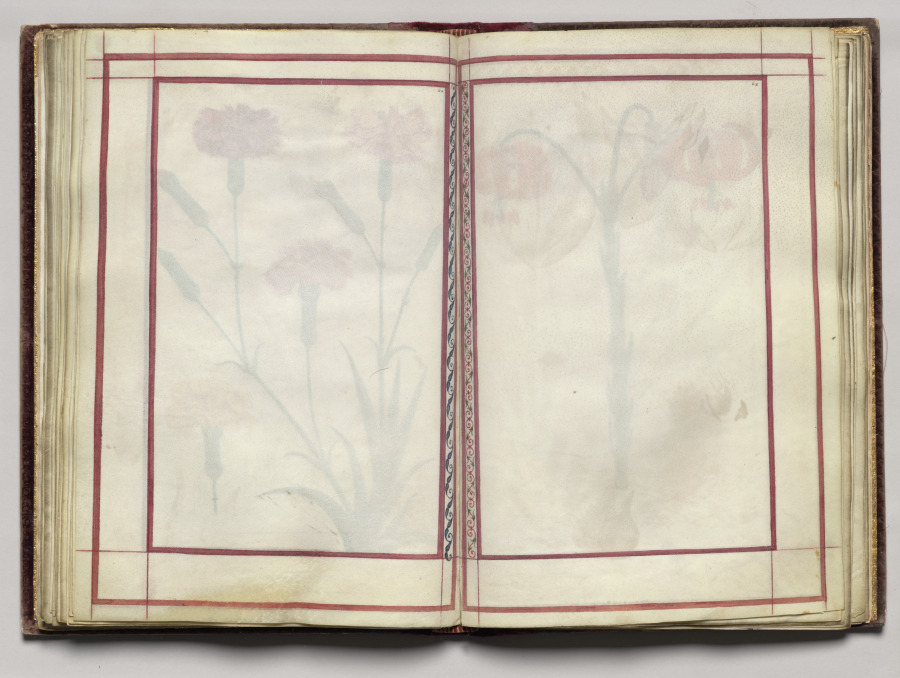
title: Border, folio 32 (recto), from Florilegium (A Book of Flower Studies)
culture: France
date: 1608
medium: watercolor, ink, silver and gold over occasional traces of pencil, on vellum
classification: Bound Volume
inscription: Dated: Poitiers 1608 (on frontispiece) Signed: On frontispiece in black ink, lower right: Van Kuyk Notation on drawing: Frontispiece: in pencil, lower margin: * élève de Van Kessel, peintre flammand (* in pencil also appears in front of Van Kuyk's name).